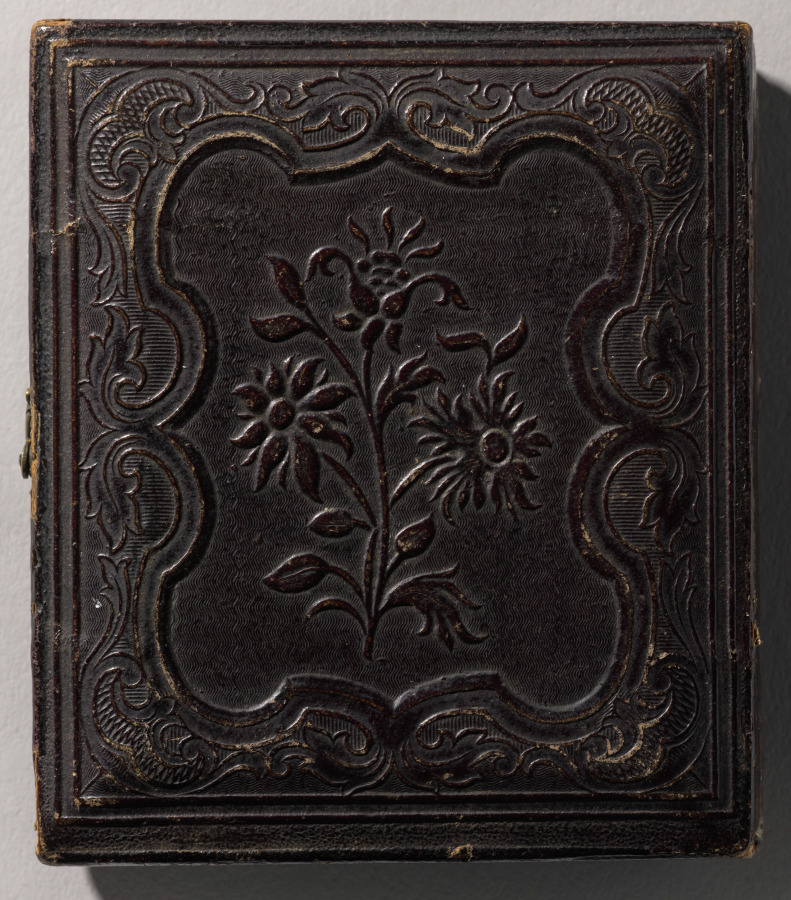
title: Boy with Cigar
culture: America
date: c. 1855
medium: daguerreotype, tinted, sixth plate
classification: Photograph